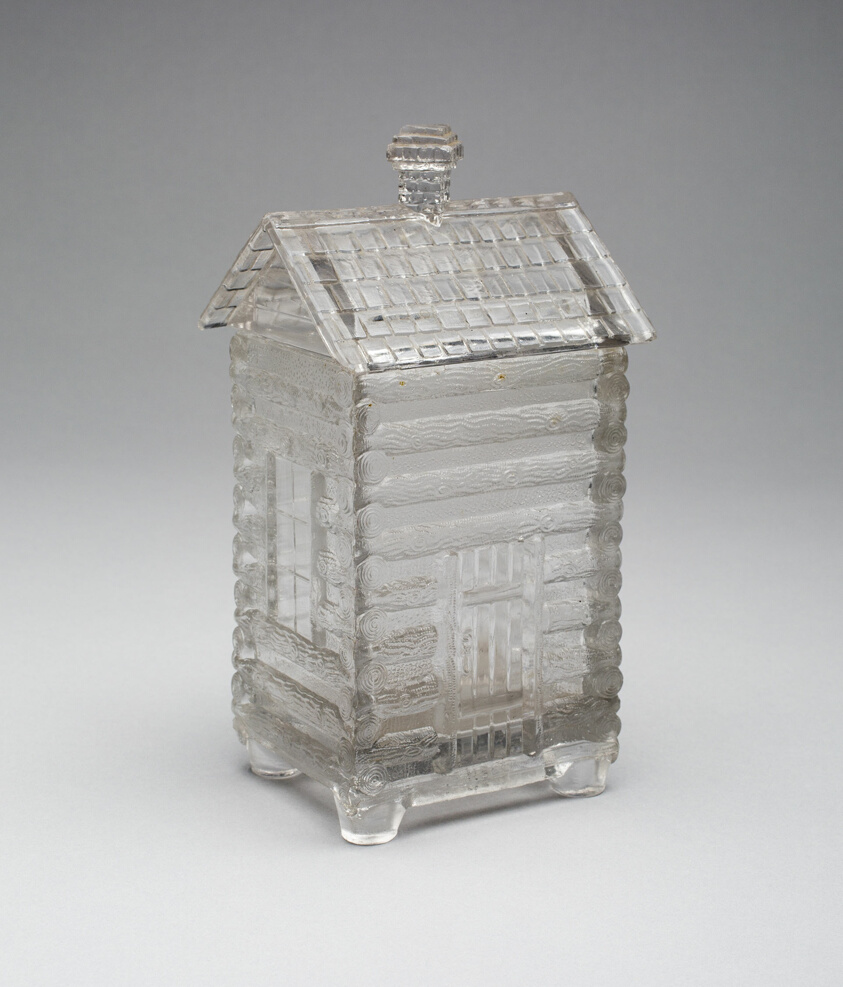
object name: Glass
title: "Log Cabin" pattern marmalade covered jar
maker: Central Glass Company; American, 1867–1896; Wheeling, West Virginia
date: c. 1875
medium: Pressed glass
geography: Wheeling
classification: vessel; glass; american decorative arts; american arts; decorative arts